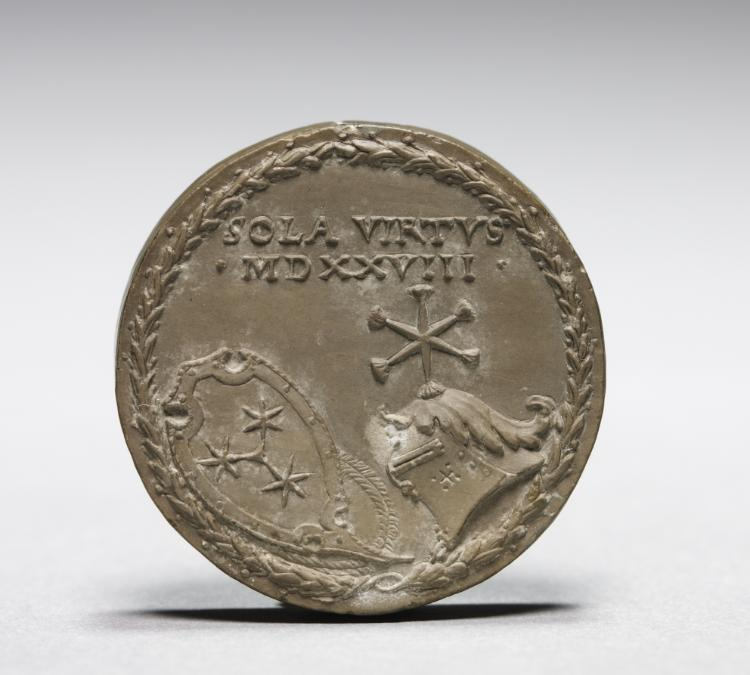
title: Model for the Reverse of the Medal of Martin III Geuder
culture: Germany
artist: Matthes Gebel (German, c. 1500–1574)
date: 1528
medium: Solnhofen limestone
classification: Sculpture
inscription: inscription: Sola Virtus, MDXXVIII (1528)